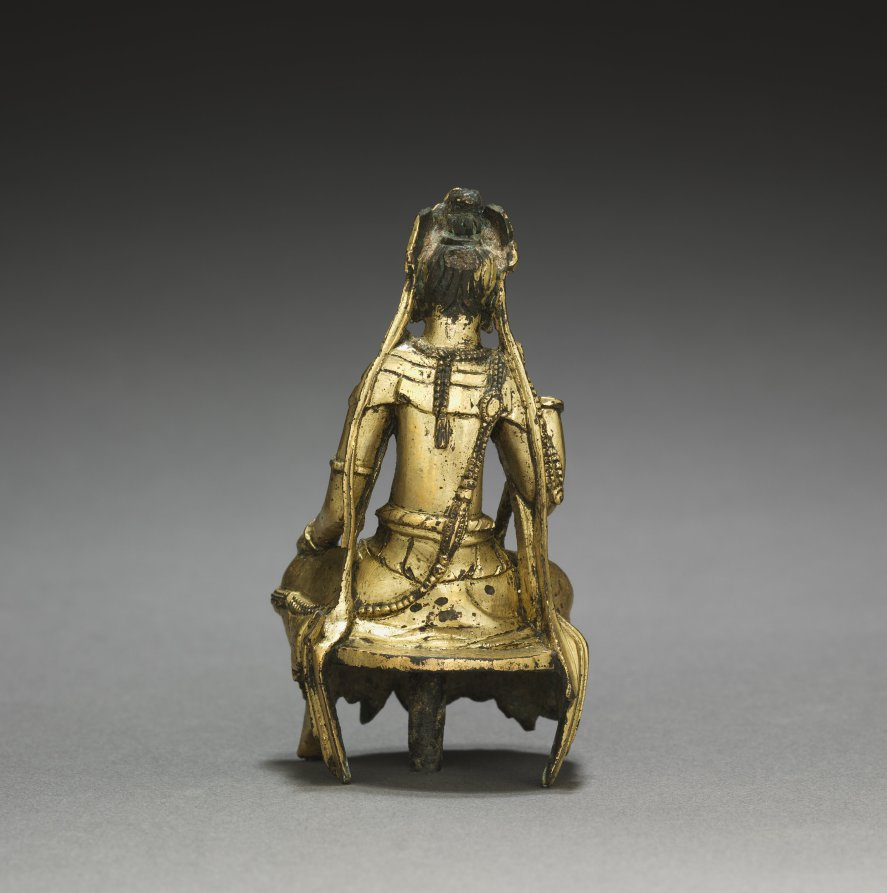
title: Bodhisattva Guanyin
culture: China, Sui dynasty (581-618)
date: 581–618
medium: gilt bronze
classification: Sculpture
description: Portable Buddhist figures and objects like this gilt bronze had a variety of uses. They could have been carried in religious processions. Others could serve as donations, souvenirs, or votive items in the context of pilgrimages to religious sites. Their miniature size also made them appropriate for placement on private altars or shrines for personal devotion.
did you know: Guanyin, the Bodhisattva of Compassion, is seated in the lalitasana pose, at royal ease with one leg tucked and one leg hanging down.